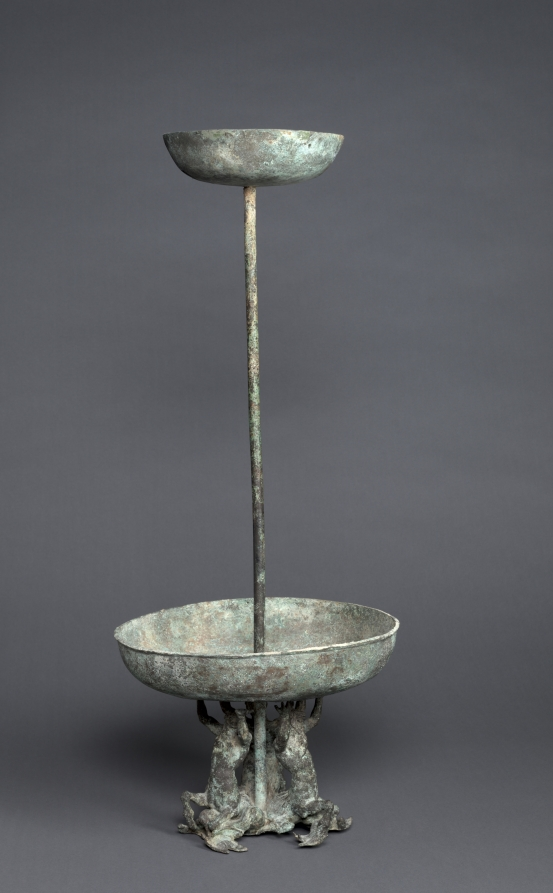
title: Kottabos Stand with Marine Centaurs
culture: Etruscan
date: 200s BCE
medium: bronze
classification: Metalwork